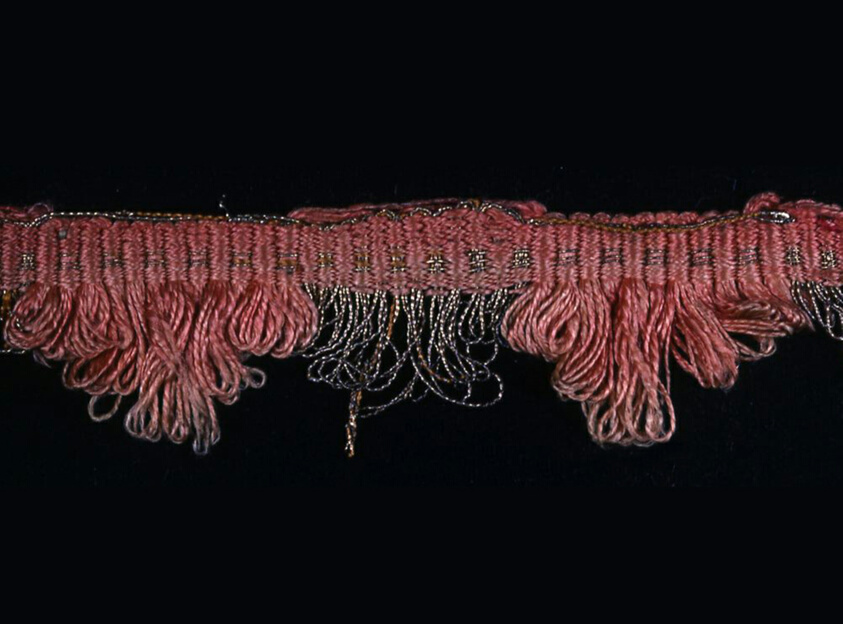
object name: Textile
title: "Renaissance" Fringe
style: Renaissance, european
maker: Italy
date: 16th century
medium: Silk and gold gilt strip wound around silk fiber core, warp-faced plain weave with extended ground wefts loop fringe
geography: Italy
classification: textile; weaving